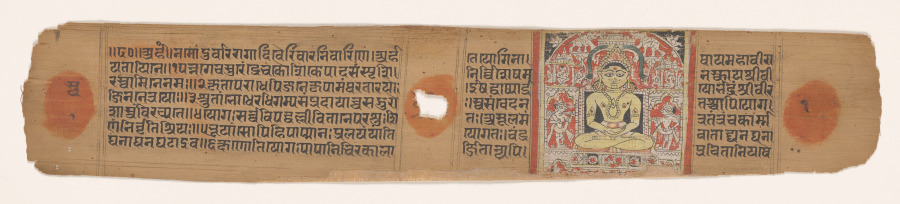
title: Rishabha enthroned, folio 1 (verso) from a Yoga-shastra of Hemachandra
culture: Western India, Gujarat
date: c. 1275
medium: Gum tempera and ink on palm leaf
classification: Painting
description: The first to achieve liberation, according to followers of Jainism, is the golden Jina named Rishabha. He is shown seated in glory on the first page of a Sanskrit text on yoga and meditation. This manuscript begins on the verso; the recto was left blank.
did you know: The small bull in the middle of his throne identifies him as Rishabha, which means "bull" in Sanskrit.